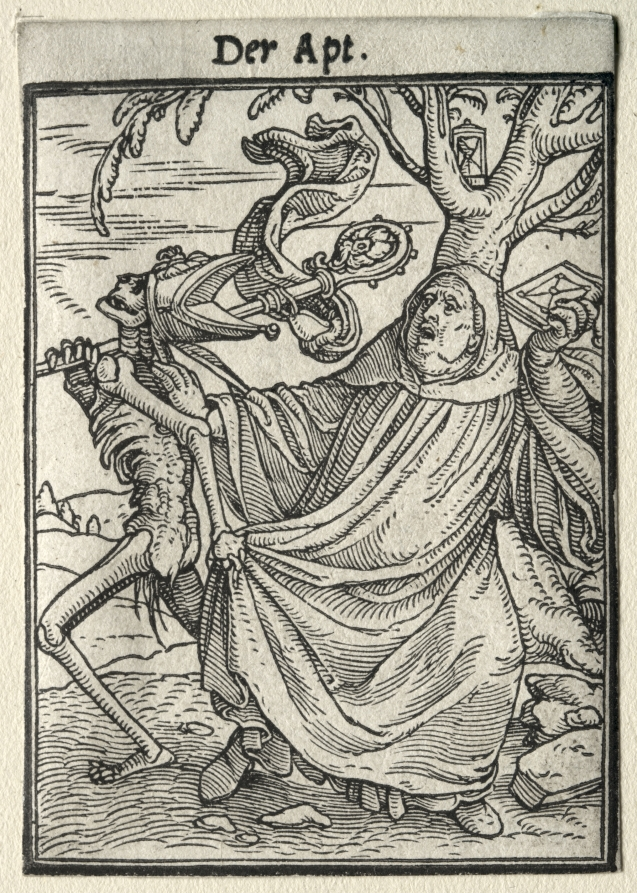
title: Dance of Death: The Abbot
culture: Germany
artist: Hans Holbein the Younger (German, active England and Switzerland, 1497/98–1543)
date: c. 1526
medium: woodcut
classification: Print